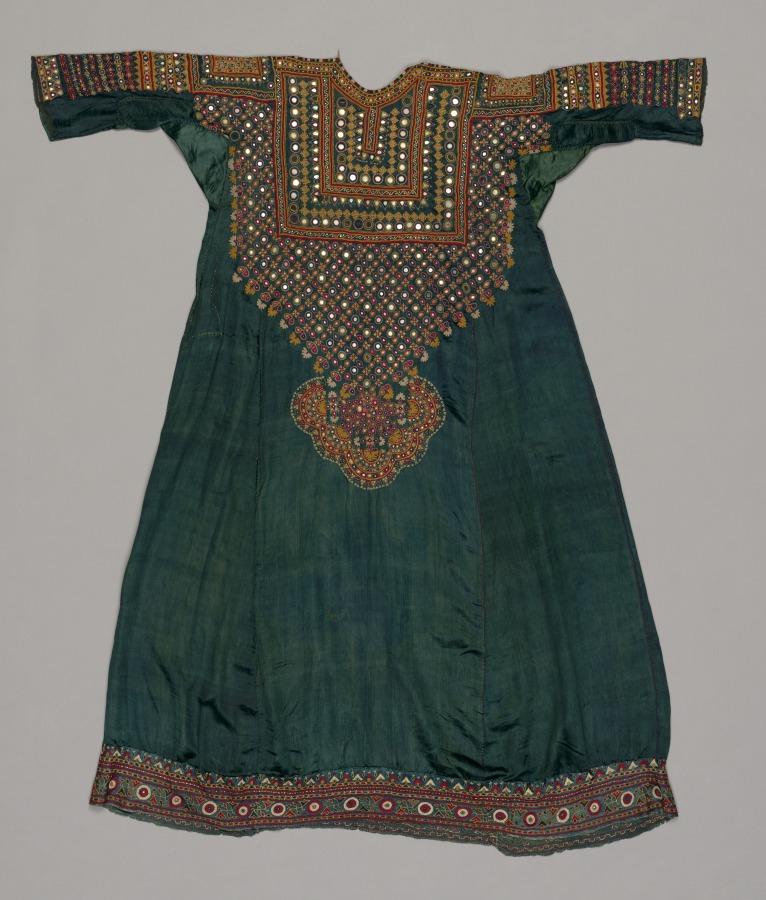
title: Woman's Dress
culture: Western India, Gujarat, Kachchh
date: 1800s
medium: silk thread on silk ground, embroidery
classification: Garment